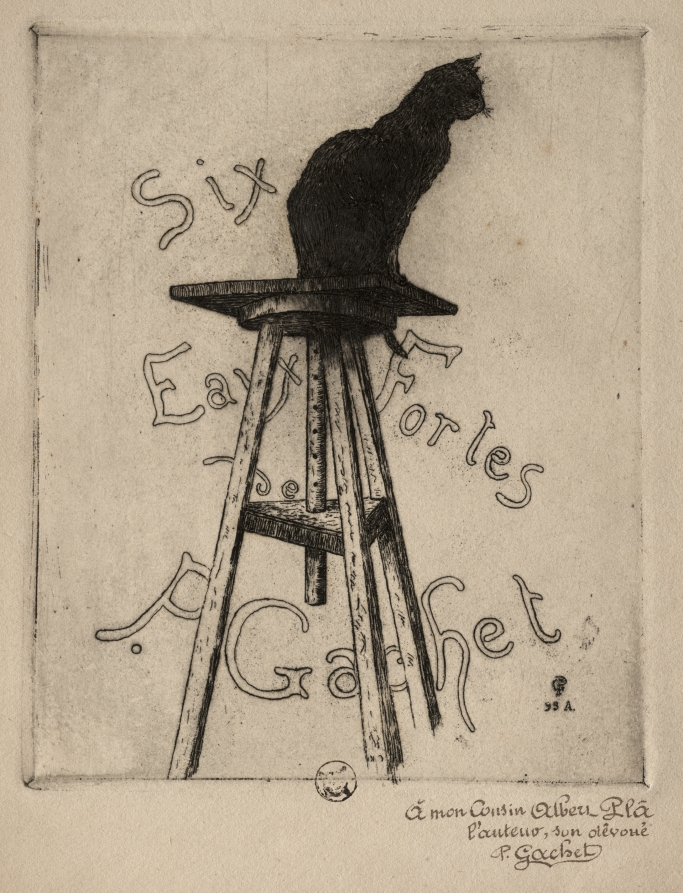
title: Six Etchings: Frontispiece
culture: France, 19th century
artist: Paul Gachet (French, 1828–1909)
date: 1895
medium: etching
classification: Print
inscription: annotated lower right margin, in ink: "A mon Cousin Albert Plâ l'auteur son dévoué Paul Gachet"